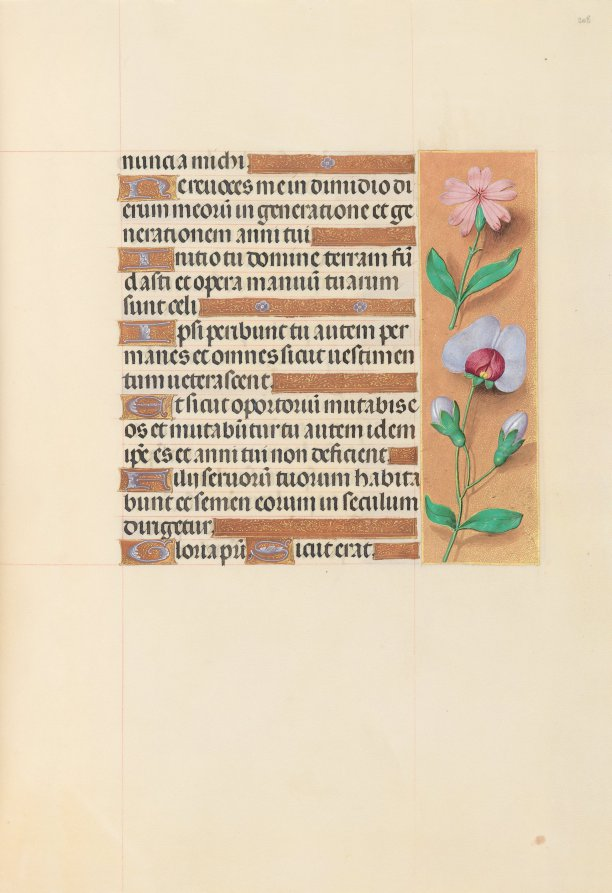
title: Hours of Queen Isabella the Catholic, Queen of Spain: Fol. 208r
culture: Flanders, Ghent and Bruges, late 15th century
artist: Master of the First Prayerbook of Maximillian (Flemish, c. 1444–1519)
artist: and Associates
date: c. 1500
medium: ink, tempera, and gold on vellum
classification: Bound Volume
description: This manuscript was illuminated by a circle of at least five highly organized manuscript painters active in the Flemish cities of Ghent and Bruges. The principal illuminator was Alexander Bening, who painted the majority of the book's miniatures. Manuscripts produced by this circle of artists are renowned for the decoration of their borders, which typically feature a rich variety of realistically-painted flowers, birds, and butterflies. This prayer book, called a book of hours, was intended not for a cleric, but for the private devotions of a lay person-in this case, Isabella the Catholic, Queen of Spain (1451-1504). Isabella's coat of arms embellishes the book's frontispiece. It is unlikely that the book was commissioned by the Queen herself; rather, she probably received it as a diplomatic gift from someone courting her patronage, perhaps Cardinal Francisco Jimenez de Cisneros. A Franciscan friar, Jimenez was dependent upon Isabella for his advancement, first to the post of Queen's confessor in 1492, and then to Archbishop of Toledo in 1495.